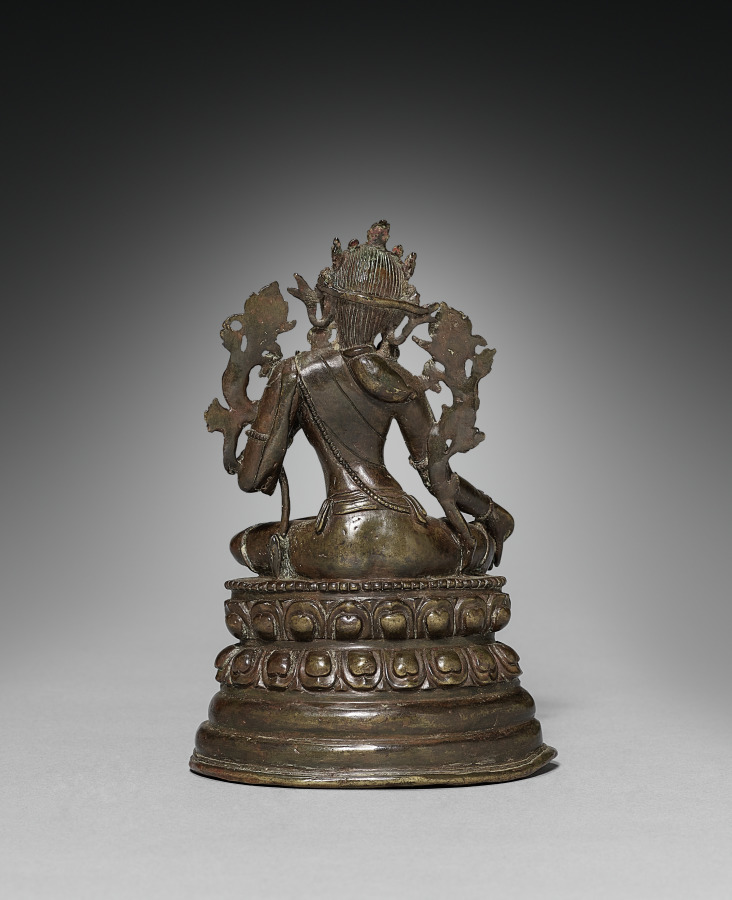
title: Seated Tara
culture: India, Bengal, late Pala dynasty, 12th Century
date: 1100s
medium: bronze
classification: Sculpture